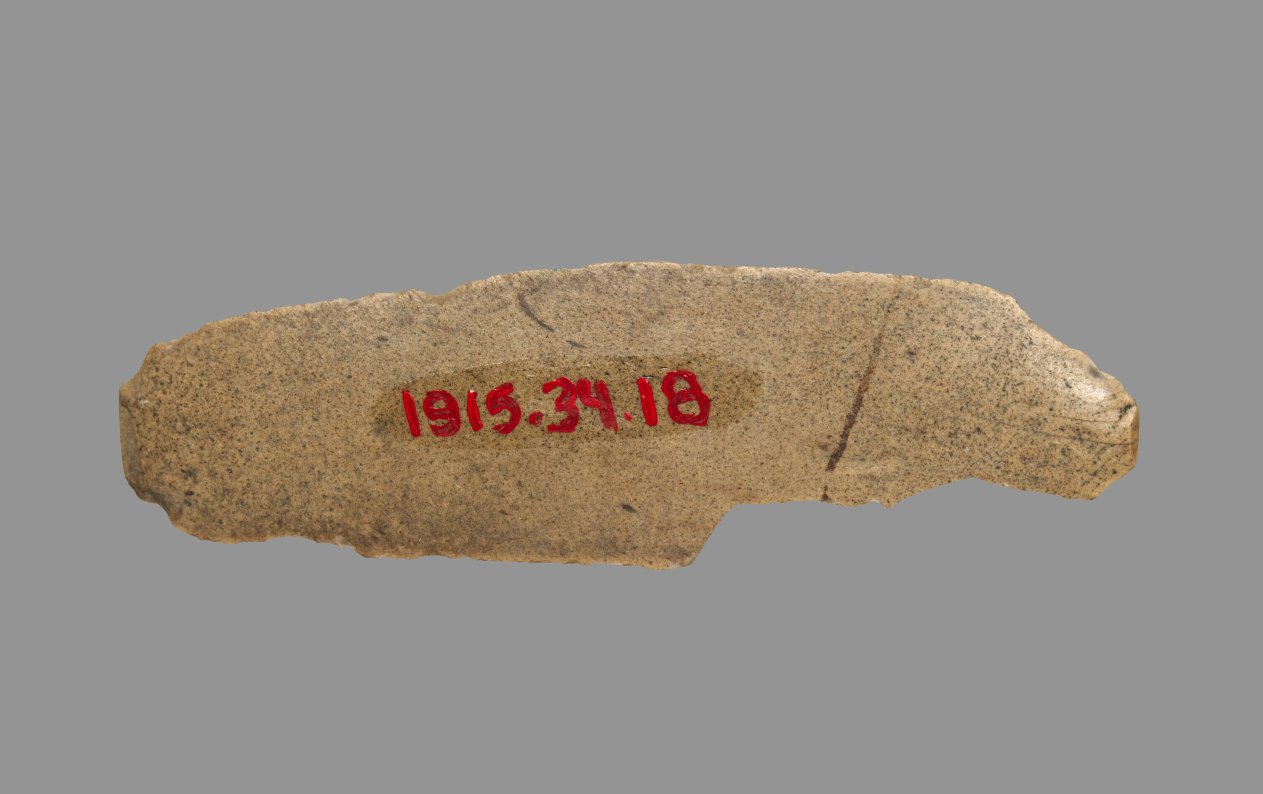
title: Sickle Blade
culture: Egypt, Middle Kingdom (2040–1648 BCE), Dynasty 12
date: 1980–1801 BCE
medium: flint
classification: Implements